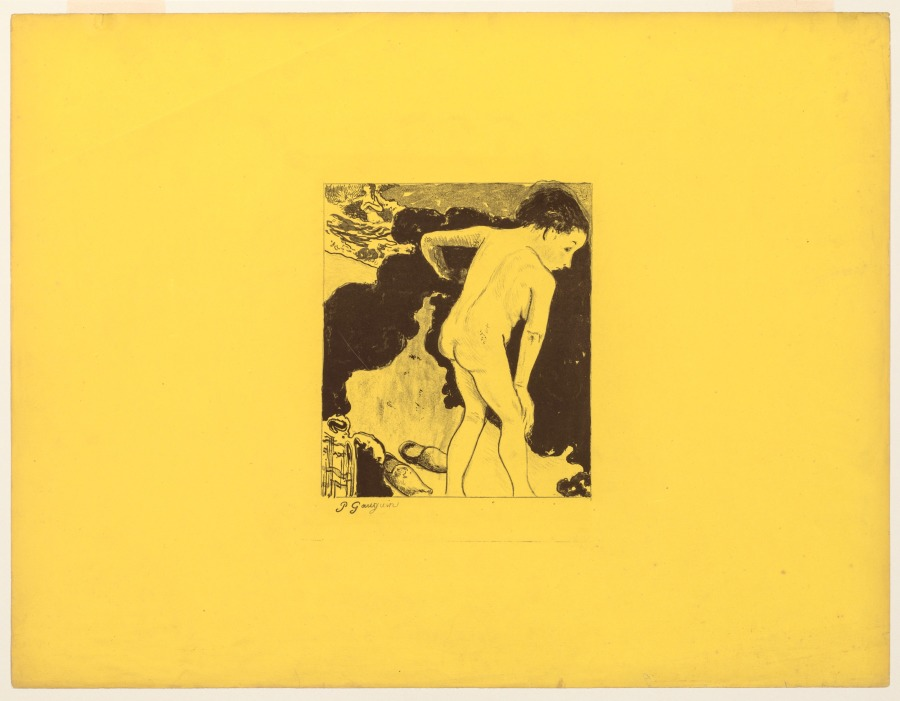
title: Volpini Suite: Breton Bathers (Baigneuses Bretonnes)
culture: France, 19th century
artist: Paul Gauguin (French, 1848–1903)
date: 1889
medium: zincograph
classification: Print